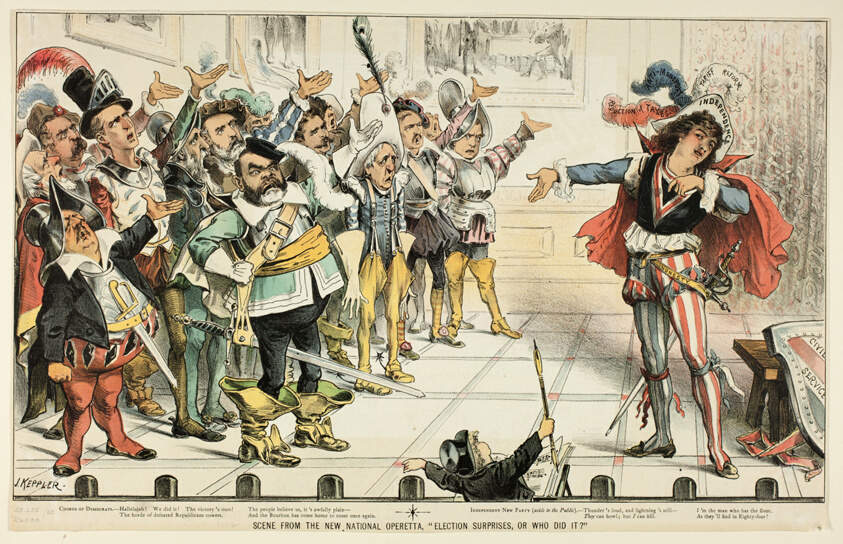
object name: Print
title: Scene from the New National Operetta, from Puck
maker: Joseph Keppler (American, 1838-1894)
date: 1883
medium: Color lithograph on newsprint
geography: United States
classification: lithograph; print; prints and drawing